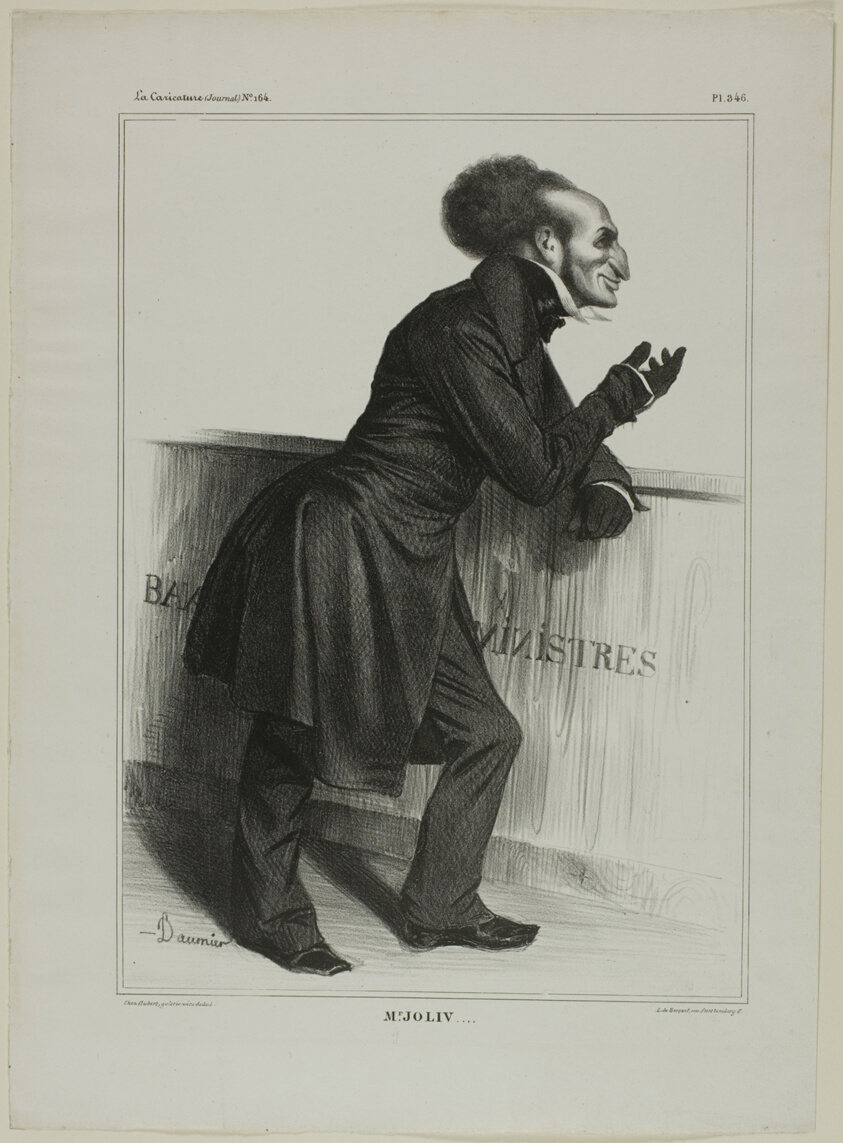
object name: Print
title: Mr. Joliv...., plate 346 from Célébrités de la Caricature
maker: Honoré Victorin Daumier; French, 1808-1879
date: 1833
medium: Lithograph in black on white wove paper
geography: France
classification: lithograph; print; prints and drawing